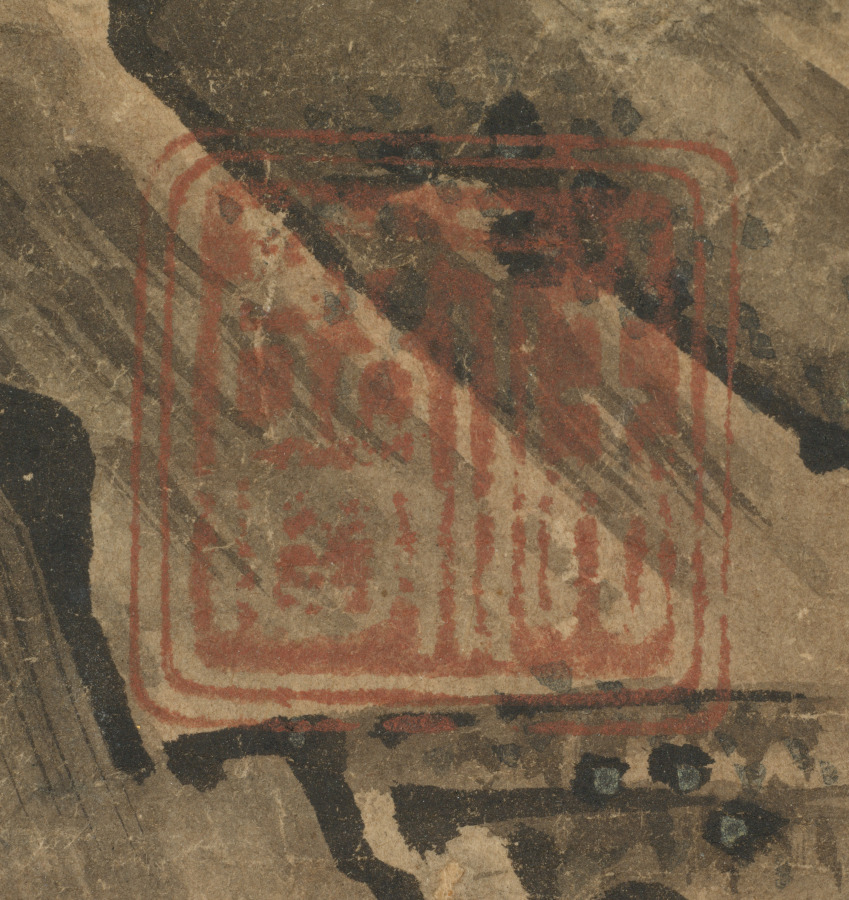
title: Returning Home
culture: Japan, Muromachi period (1392–1573)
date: mid-1500s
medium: hanging scroll, ink and color on paper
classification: Painting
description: This painting bears a seal reading Shōkei. The style of the seal resembles that used by Kenkō Shōkei (active about 1470–after 1523), a monk and painter at the Zen temple Kenchōji in Kamakura who studied in Kyoto for three years with Geiami (1431–1485?), painter to the shogun as well as curator of the shogun’s collection of art. However, the seal was carved to look like Shōkei’s and added to the painting at a later date by someone who thought the unsigned landscape was similar to his work. The painting has compositional and some stylistic similarities to images by other Kanto-based artists like Maejima Sōyū (active mid-1500s), who trained with Kano school artists. Specifically, the pines clinging to the massive boulder in front of a pavilion with mountains receding into atmospheric space—in a composition weighted in a single corner of the painting—is a Kanto-inflected derivation of the painting of the Zen monk-painter Tenshō Shūbun (active about 1414), whose work was a major inspiration for Kano school painters.